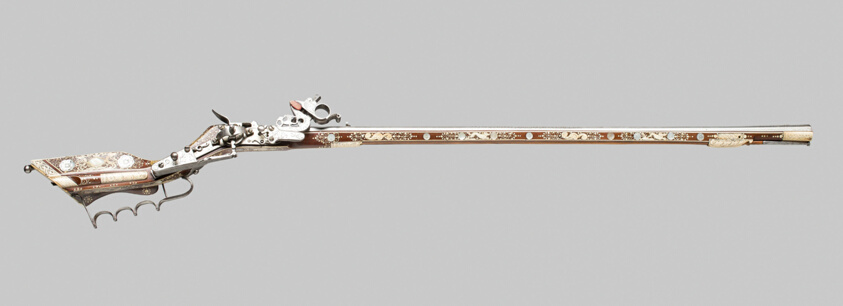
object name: Arms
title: Wheellock Birding Rifle (Tschinke)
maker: Polish, Silesia, Teschen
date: 1640/60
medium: Steel, fruitwood, staghorn, bovine horn, and mother-of-pearl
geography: Teschen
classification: firearm-long gun; arms; arms and armor